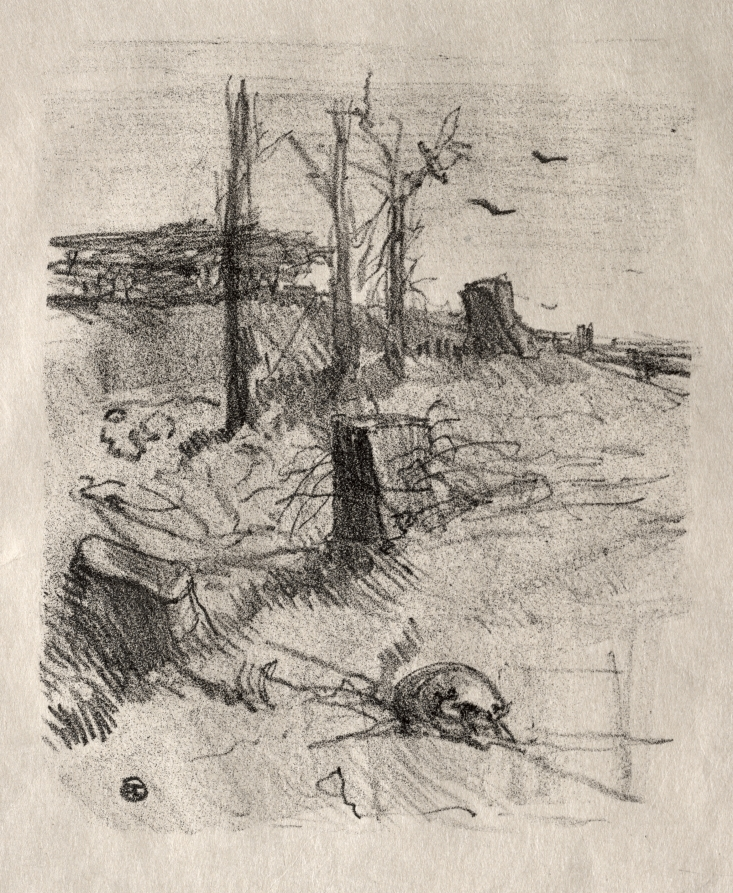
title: Un Cimetière en Galicie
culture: France, 19th century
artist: Henri de Toulouse-Lautrec (French, 1864–1901)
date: 1898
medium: lithograph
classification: Print